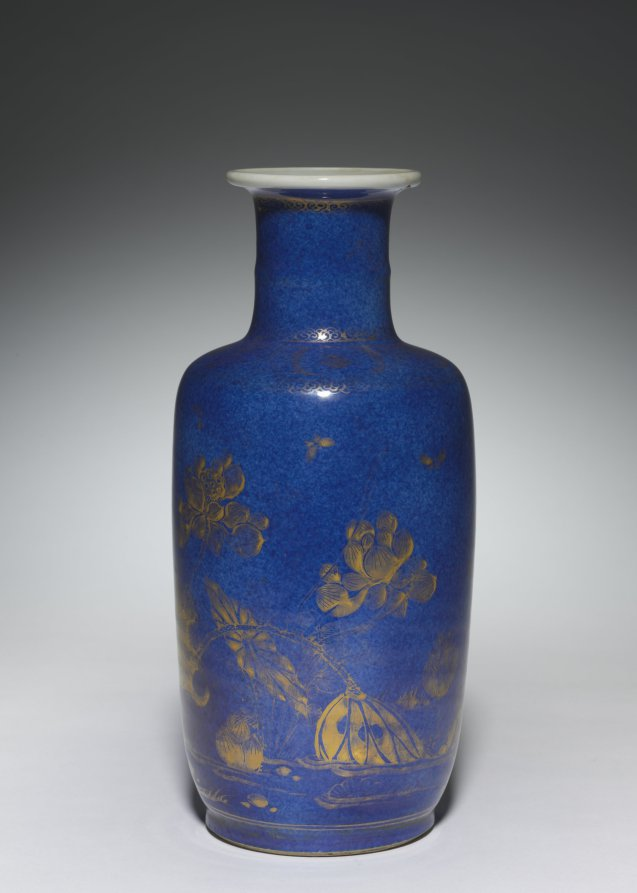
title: Vase with Lotus Plants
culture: China, Qing dynasty (1644-1911), Kangxi reign (1661-1722)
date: 1662–1722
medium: porcelain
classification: Ceramic